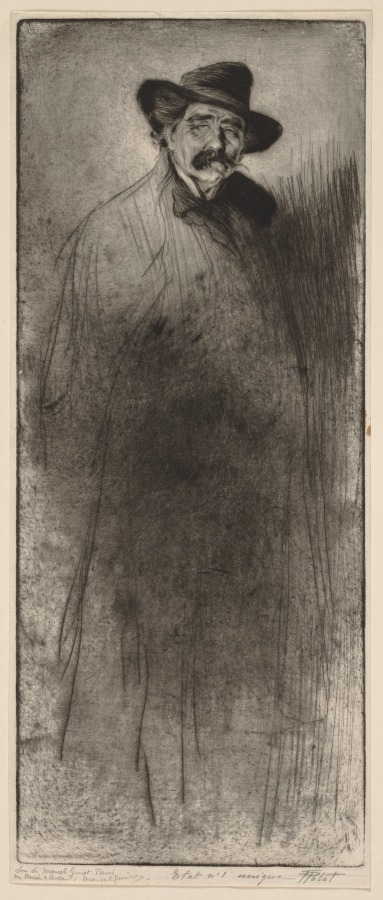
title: The Old Garibaldian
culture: France, 20th century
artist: Tigrane Polat (French, 1874-)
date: 1900?–1925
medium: drypoint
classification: Print